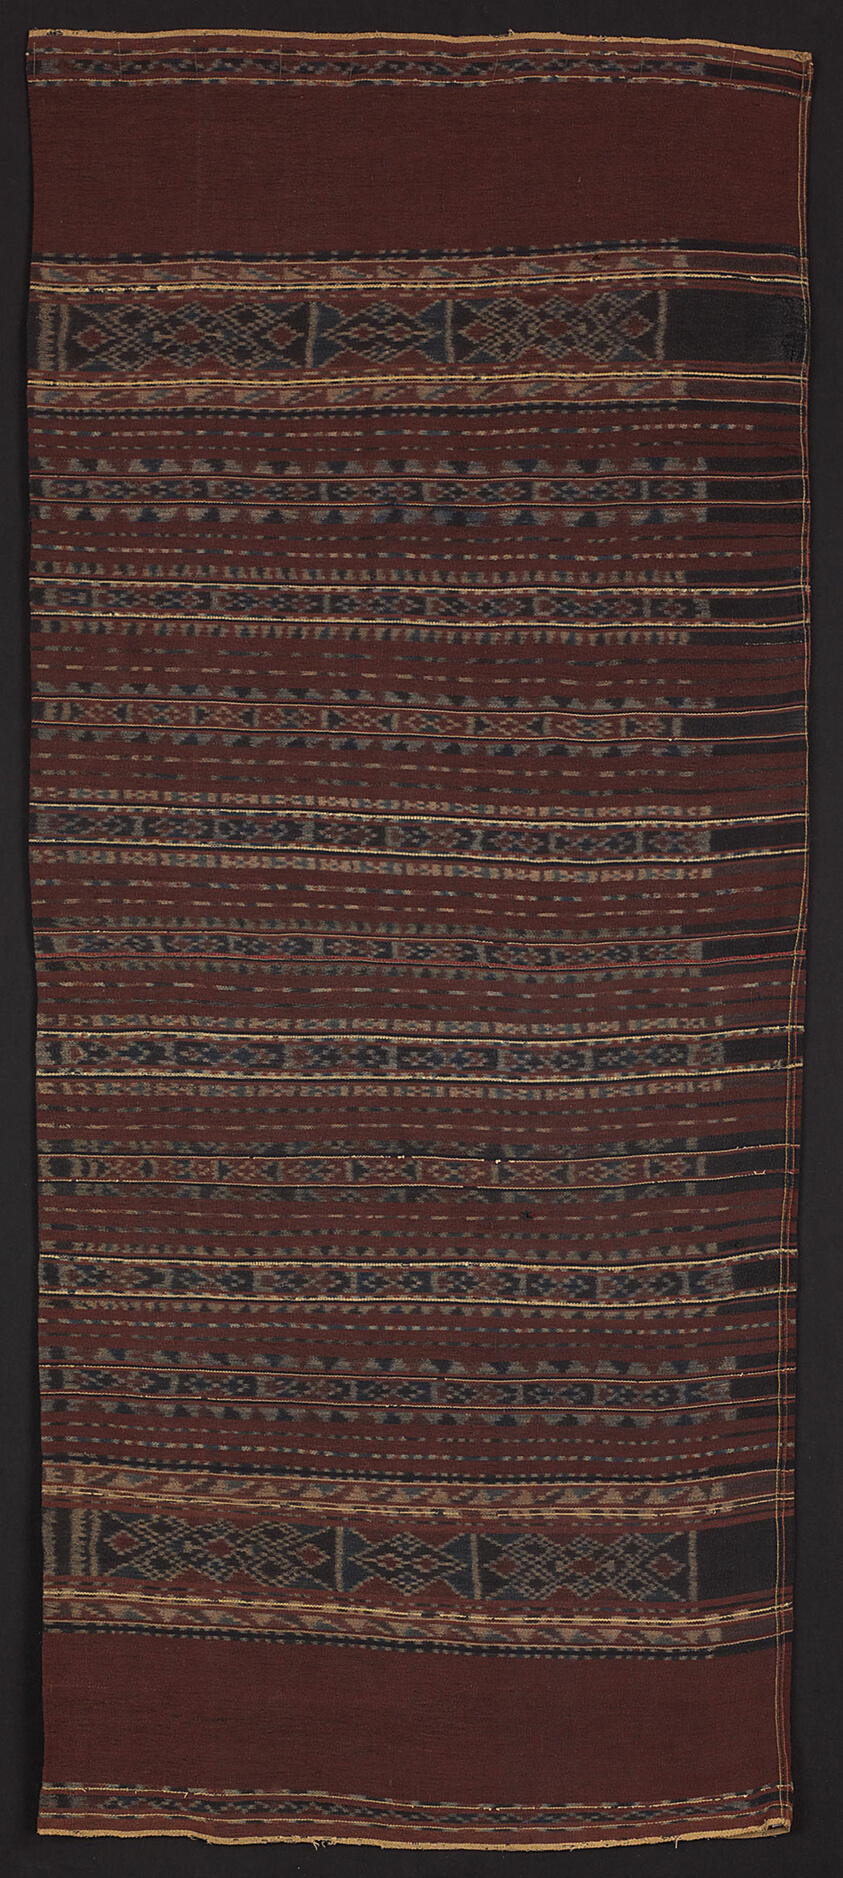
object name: Costume and Accessories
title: Woman's Skirt (Sarong)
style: indonesian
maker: Indonesia, Lembata, Ili Ape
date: 19th century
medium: Two panels joined: stripes of cotton and silk, warp resist dyed (warp ikat) plain weave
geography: Indonesia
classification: textile; weaving; weaving - printed; costume